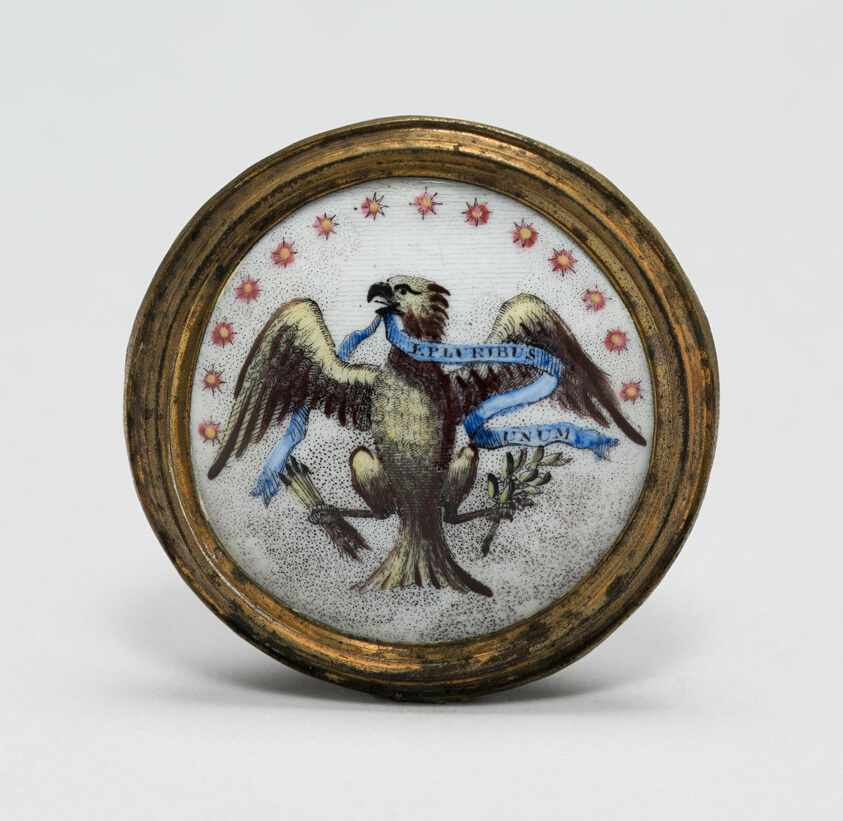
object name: Metalwork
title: Cloak Pin (Knob or Tieback)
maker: Probably Birmingham, England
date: 1791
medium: Transfer printed and polychrome enamels on copper, brass and iron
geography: England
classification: costume accessory worn above the waist; metalwork; pin (jewelry); european decorative arts